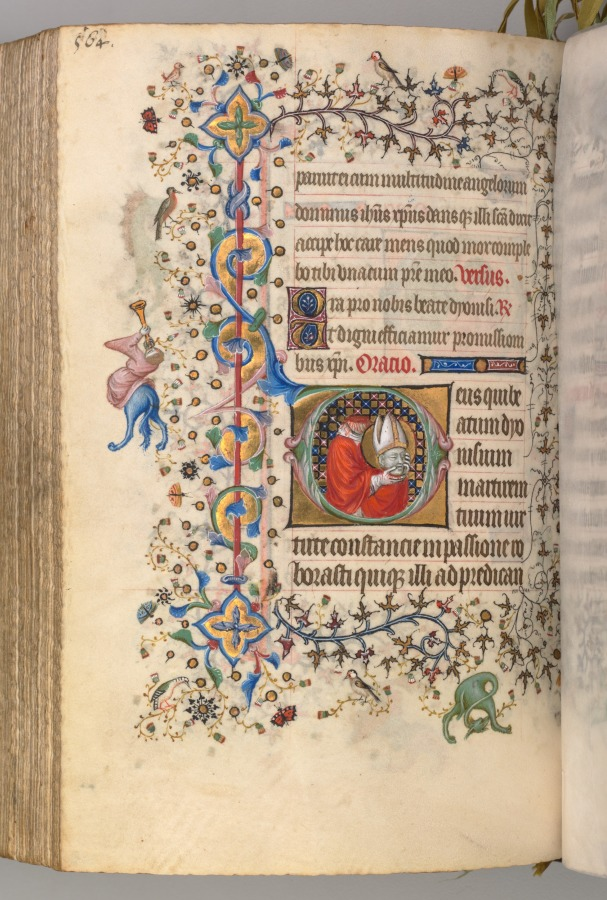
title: Hours of Charles the Noble, King of Navarre (1361-1425): fol. 276v, St. Denis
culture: France, Paris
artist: Master of the Brussels Initials and Associates (French)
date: c. 1405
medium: ink, tempera, and gold on vellum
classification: Bound Volume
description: This precious volume was obviously highly prized by its owner, the French-born King of Navarre, who had his coat of arms painted on no less than twenty folios. Rather than directly commissioning this manuscript from a specific workshop, it seems that Charles the Noble acquired his book of hours -- perhaps ready-made for the luxury market -- while on a trip to Paris in 1404-05. A collaborative effort, six painting styles are evidenced within the pages of this codex, those of two Italians, two Frenchmen, and two Netherlanders. The painter who was responsible for the planning and decoration of the book, and who produced seventeen of the large miniatures, was a Bolognese artist known as the Master of the Brussels Initials. His principal assistant, responsible for most of the borders, was a Florentine who signed his name "Zecho" da Firenze on folio 208 verso.